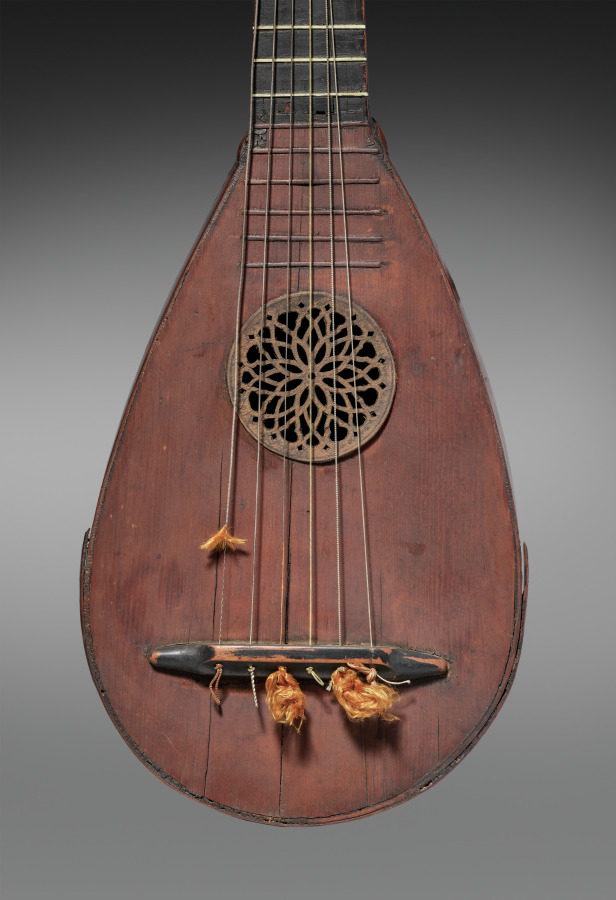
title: Pandurina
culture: Italy, 15th century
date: 1400s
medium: varnished wood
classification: Musical Instrument